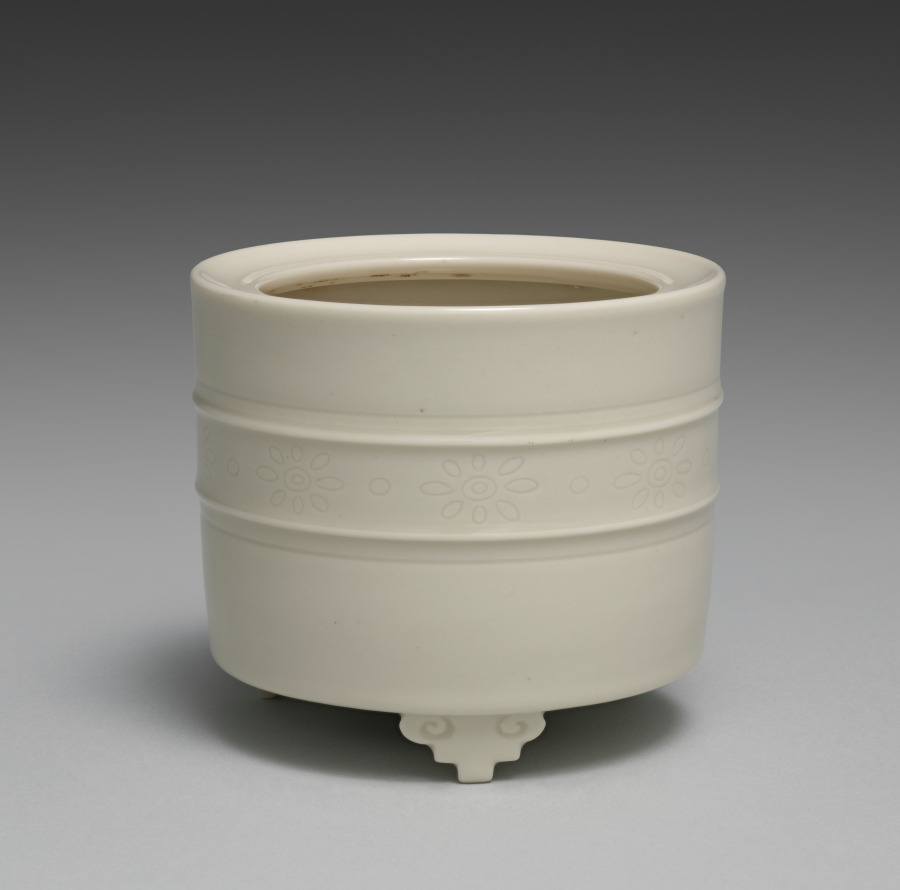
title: Incense Burner with Flowers and Dots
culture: Japan, Meiji period (1868–1912)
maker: Seifū Yohei III (Japanese, 1851–1914)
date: 1893–1914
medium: Porcelain with creamy white translucent glaze and molded and incised design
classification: Ceramic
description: Yohei III made incense burners in a wide variety of designs and styles. The body and glaze of this one are taihakuji, or “great white porcelain,” an important early invention Yohei III devised in 1872 that involved the combination of a distinctive translucent, creamy glaze over an ivory-colored clay body. The silver lid is meant to look like a single flower. The vessel has tapering legs with a combined curvilinear and geometric design; the bands encircling the middle have simple, incised flower motifs alternating with single dots.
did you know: This cylindrical incense burner has molded decorations on its creamy body.